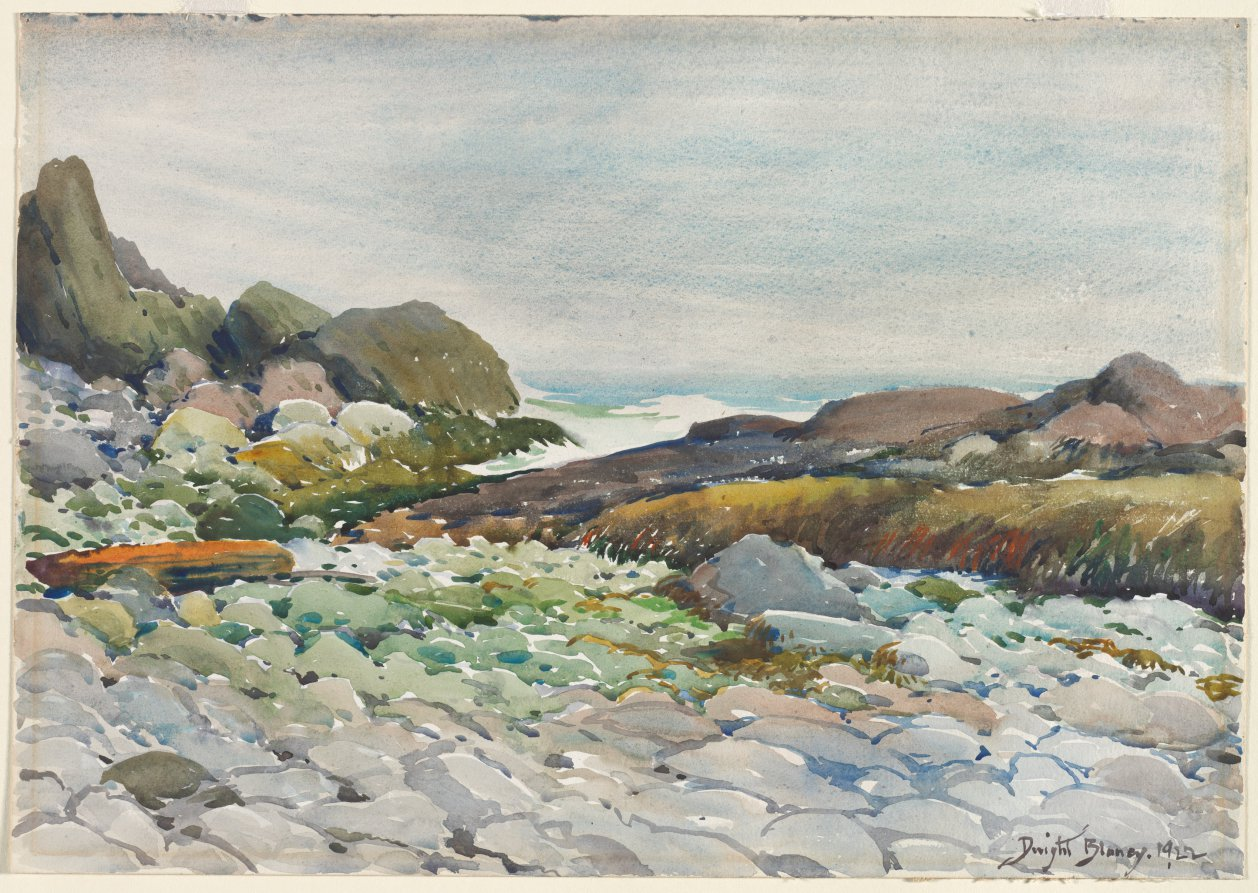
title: Over the Ledges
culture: America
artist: Dwight Blaney (American, 1865–1944)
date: 1922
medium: watercolor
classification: Drawing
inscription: Signed Dwight Blaney 1922 in lower right corner